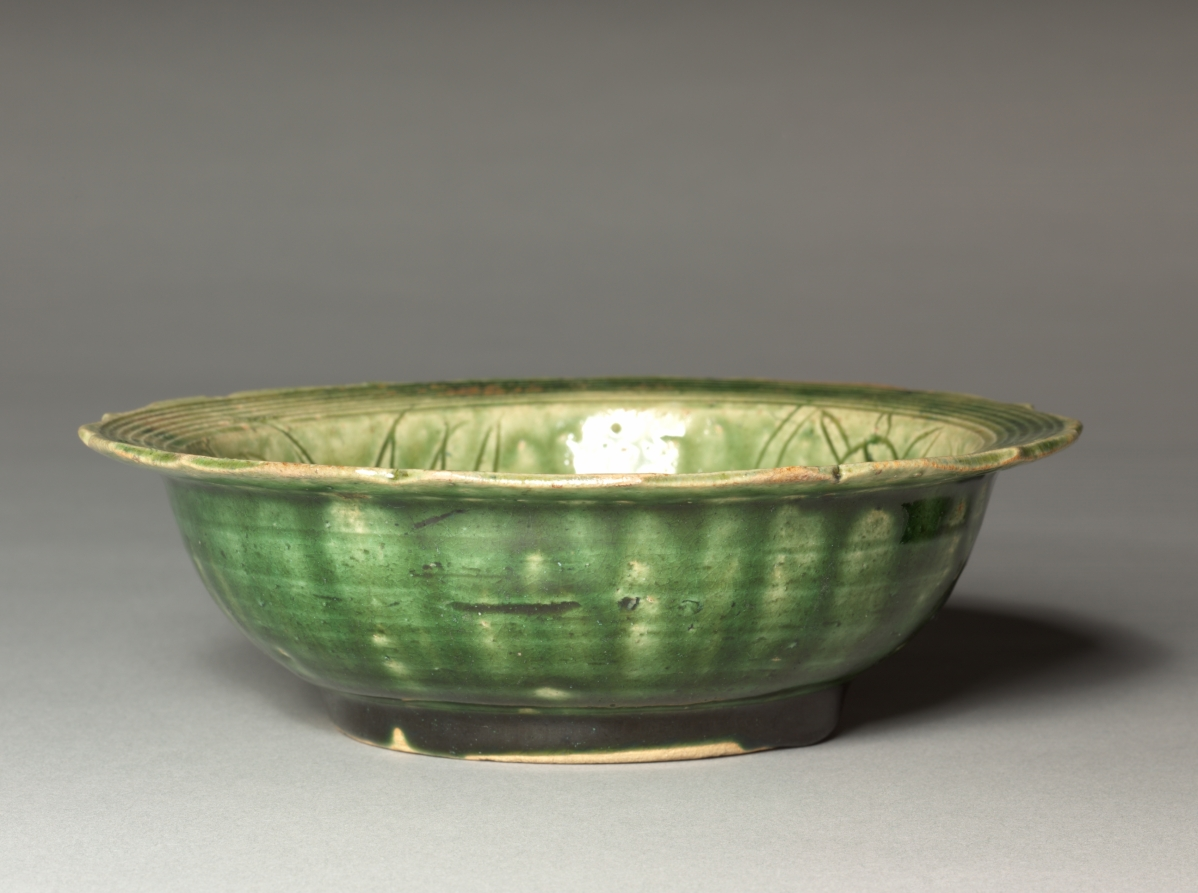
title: Dish with Incised Design of a Rider on a Mule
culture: Japan, Momoyama period (1573–1615)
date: c. 1600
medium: Buff stoneware covered with copper-green glaze (Mino ware, Oribe type)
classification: Ceramic